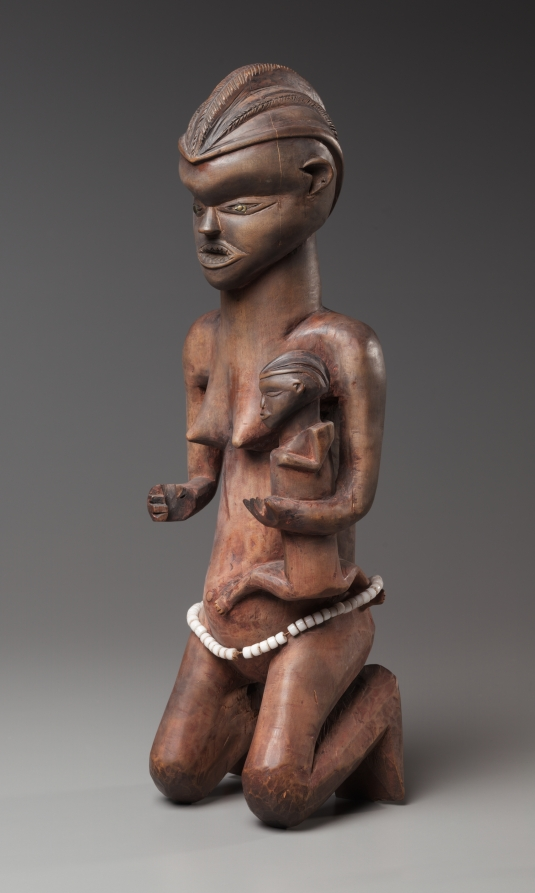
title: Mother-and-Child Figure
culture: Africa, Central Africa, Democratic Republic of Congo, Pende-style maker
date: late 1800s–early 1900s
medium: Wood, glass beads, upholstery studs, natural fiber, and pigment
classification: Sculpture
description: Wearing an elaborate lobed headdress and a beaded waistbelt, and having filed teeth and red-powdered skin, this maternity figure seems to have once carried an ax and a cup, wooden imitations of the two most important chiefly attributes. Perhaps together with a male counterpart, it was secretly kept inside the ritual house, serving as a guardian of the chief’s treasure. Its style places it in the westernmost corner of Pendeland, between the Lutshima and Kwilu rivers.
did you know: Eastern Pende carvers also once made larger mother-and-child sculptures to adorn the tops of chiefs' ritual houses.